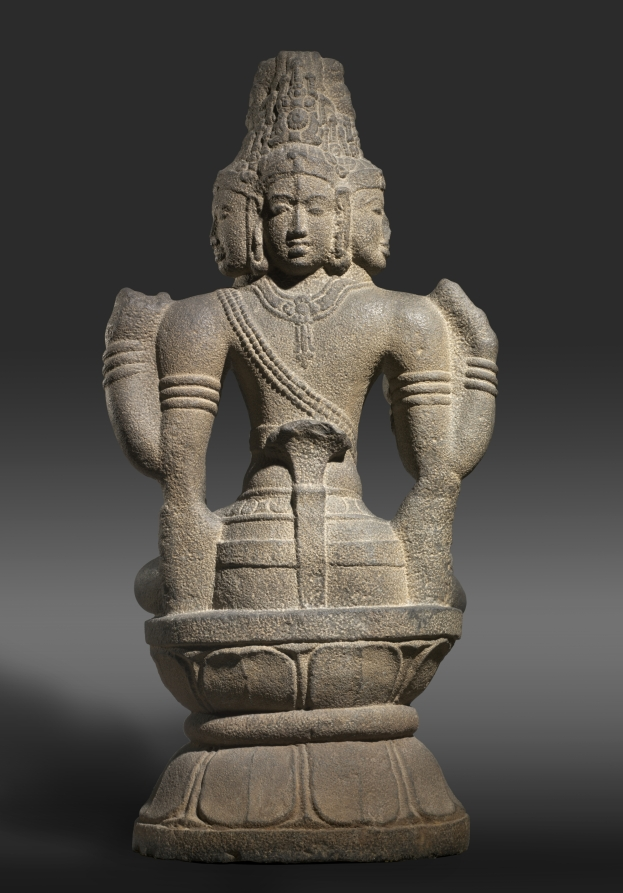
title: Brahma-Shiva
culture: South India, Tamil Nadu, Chola dynasty, late 10th - early 11th century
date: late 900s–1000s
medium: granite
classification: Sculpture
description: In the Hindu pantheon Brahma is in charge of carrying out the work of creation. In this tour-de-force of South Indian temple sculpture, he is in a special regal aspect, with the only elements of his typical priestly appearance being the prayer beads and the matted dreadlocks piled on his head. Four arms connote superhuman power, and four heads convey the idea that his creative activities spread in all four directions. His upper right hand enjoins freedom from fear, and the lower holds a lotus bud associated with birth and the process of creation. His lowered left hand is held in the gift-giving gesture, suggestive of the gift of creation he will bestow upon the world.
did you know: The back of the sculpture retains the original textured surface from a pointed chisel, suggesting it was in a niche or near a wall, protected from worshippers’ touches.